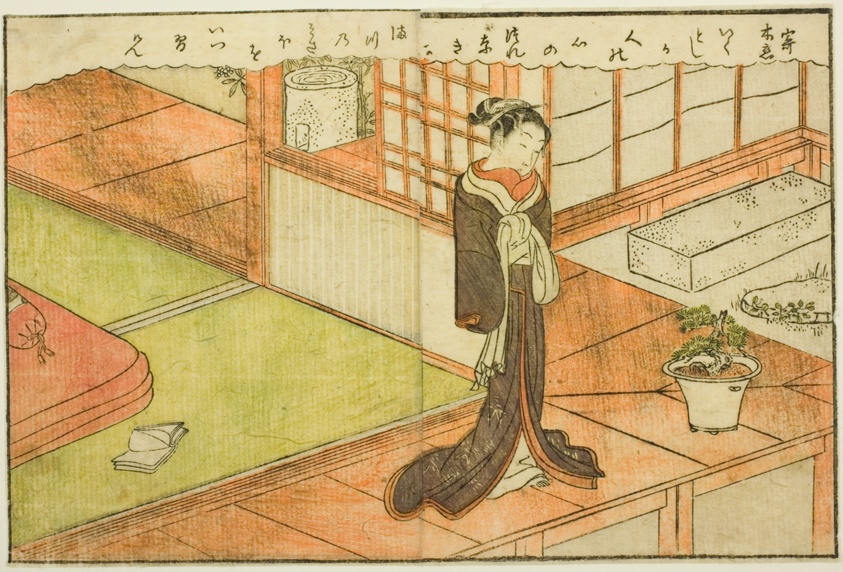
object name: Print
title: Double-page Illustration from Vol. 2 of "Picture Book of Spring Brocades (Ehon haru no nishiki)"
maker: Suzuki Harunobu 鈴木 春信; Japanese, 1725 (?)-1770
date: 1771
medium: Color woodblock print; double-page illustration from book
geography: Japan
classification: woodblock print; print; asian art